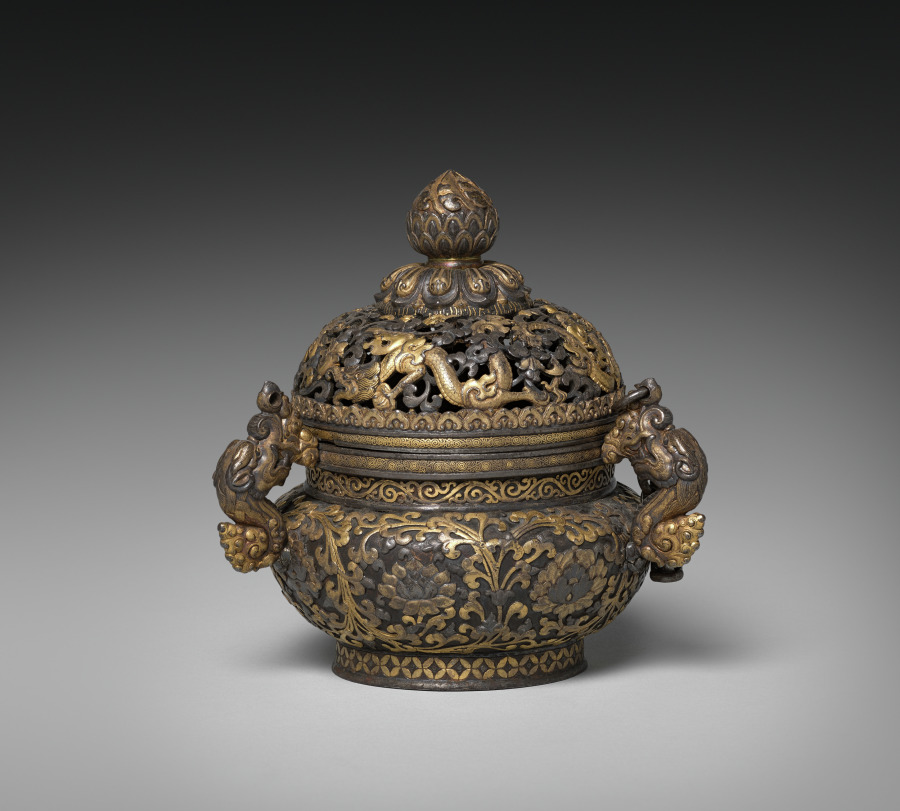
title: Incense Burner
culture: China, Yongle Period (1403-1424)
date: early 1400s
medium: iron inlaid with gold and silver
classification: Metalwork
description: This incense burner with gold and silver inlay has three dragon-head handles. Its main body is decorated with flowers placed in round fields formed by a winding creeper. The perforated cover is decorated with a dragon. The lotus bud on the top is used as a handle.